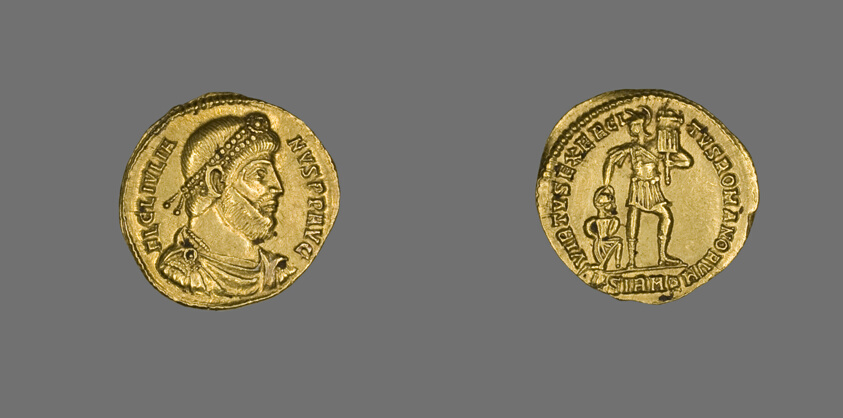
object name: Coin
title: Solidus (Coin) Portraying Emperor Julian II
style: roman (ancient, style or period)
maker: Roman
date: 361 (Summer)-363 (26 June)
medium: Gold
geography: Rome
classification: coin; ancient art